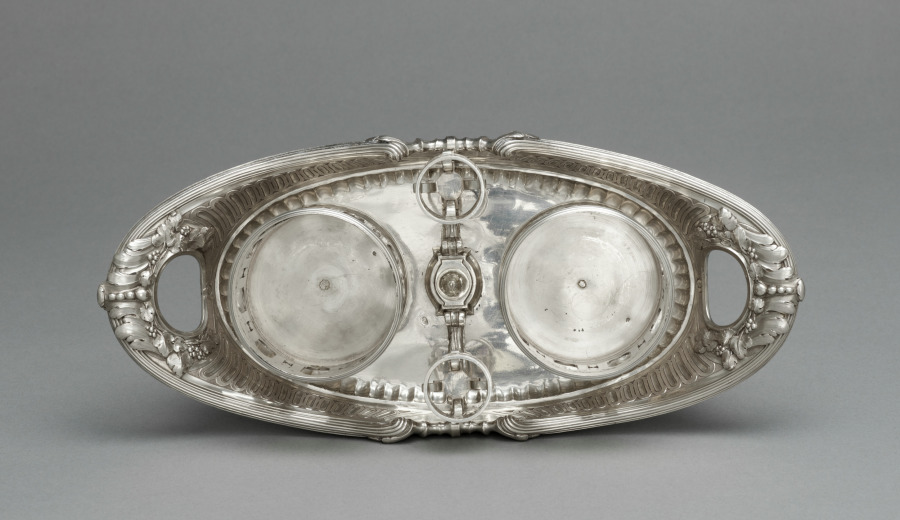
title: Cruet Stand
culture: France, 18th century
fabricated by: Robert Joseph Auguste (French, 1723–after 1795)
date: 1766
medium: silver and glass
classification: Silver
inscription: inscribed on base: R. J. Auguste Paris 1766.